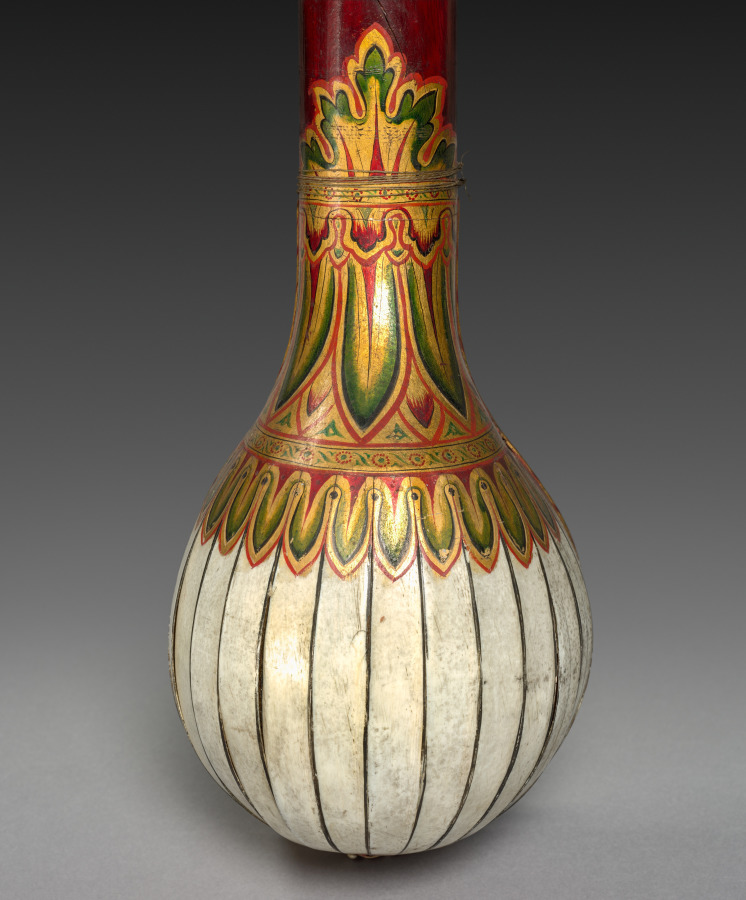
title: Sitar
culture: Eastern India, Bengal or Bangladesh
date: c. 1850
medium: Gourd and wood with pigment, ivory, and bone; copper alloy: frets; iron alloy: strings (with one modern copper replacement)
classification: Musical Instrument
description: The stringed instrument known as the sitar usually provided the central sound for the musical performances that were a constant feature of court life in India. The sitar could then be accompanied by percussion, voice, and other supporting instruments. In Raja Deen Dayal’s photograph Maharaja of Rewa in Prayer (2016.266.21), a musician strums a sitar in order to please the deities on the royal altar. The improvised compositions are played in a mode, or key, that correlates to the time of day and season of the year.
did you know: Many paintings of Indian court life depict female musicians holding and playing this kind of lightweight stringed instrument.